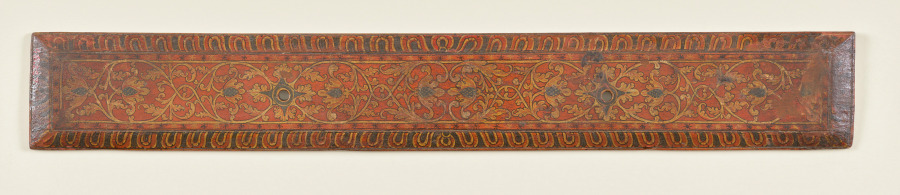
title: Bottom Cover for a Buddhist Manuscript (recto)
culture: Sri Lanka, Singhalese, Late 17th century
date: c. 1700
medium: Gum tempera on wood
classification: Manuscript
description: Palm leaf material is still used for manuscripts in Sri Lanka. The palm leaves are prepared first by boiling them, drying them in the sun, and then rubbing them with oils. Scribes then use a metal stylus to incise the text. Then charcoal powder is wiped across the pages, filling in only the inscribed lines.